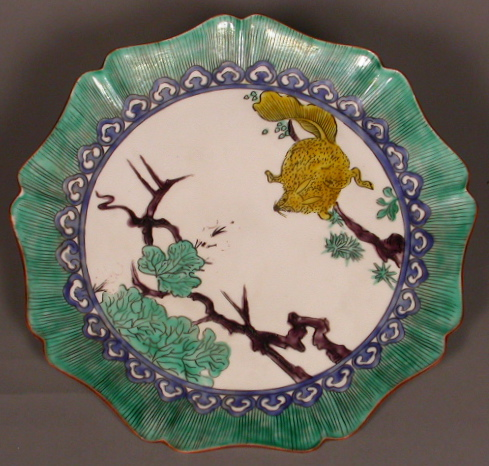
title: Ko-Kutani ware plate with design of a squirrel in a tree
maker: Artist unknown (Japanese, active 17th century)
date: 17th century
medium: Glazed stoneware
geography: Japan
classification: ceramics; asian art